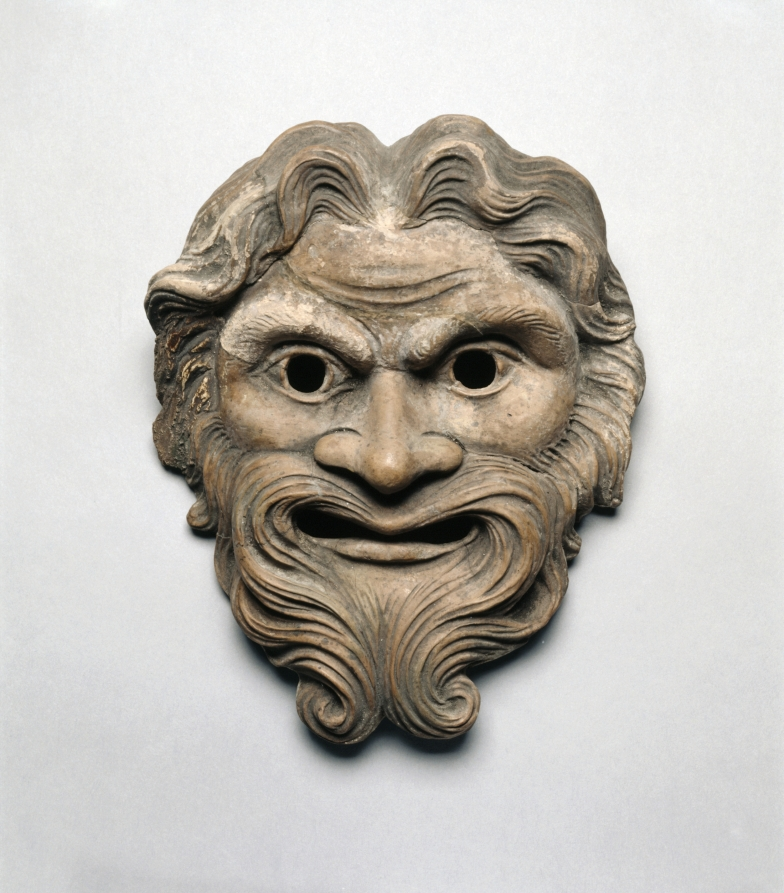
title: Mask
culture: Italy, Roman (?)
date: 1–100 CE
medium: terracotta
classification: Sculpture